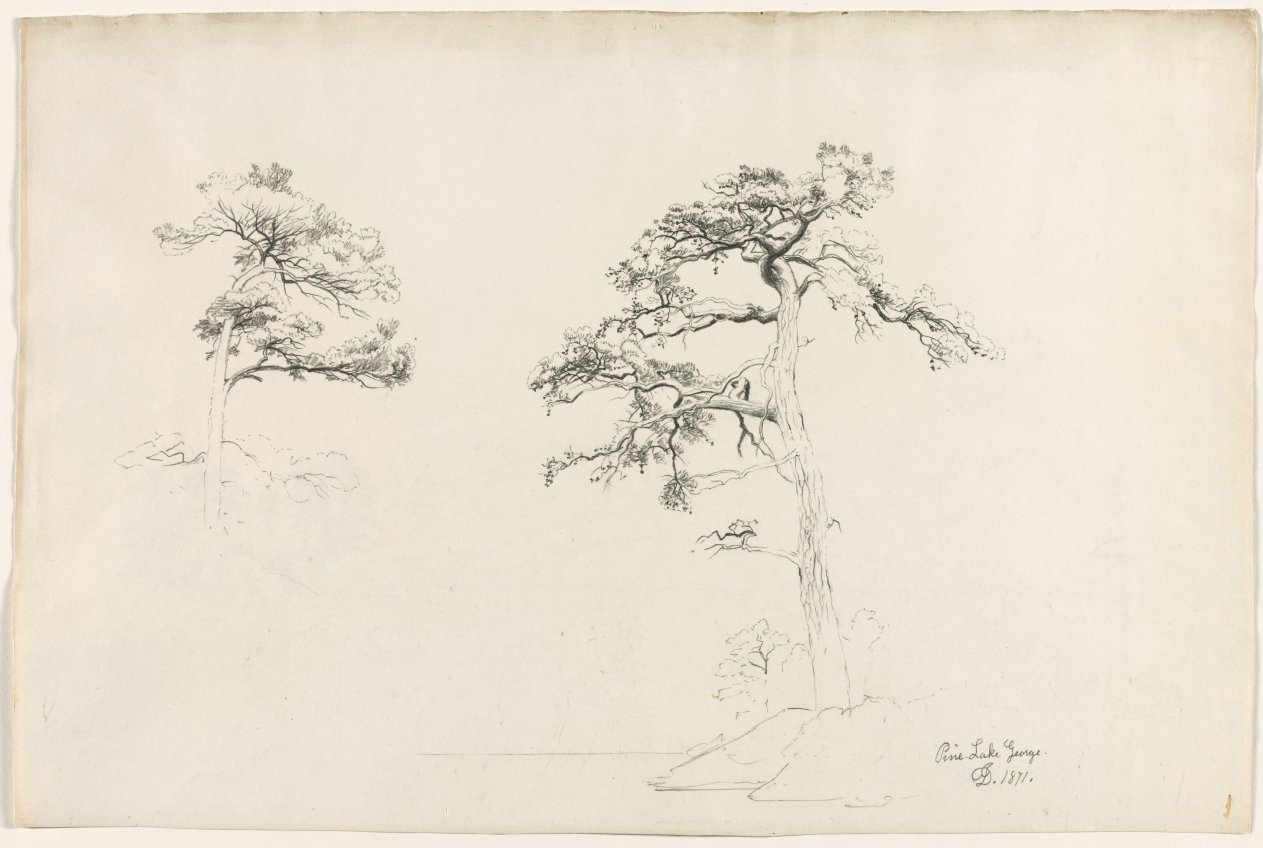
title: Pine, Lake George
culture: America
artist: David Johnson (American, 1827–1908)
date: 1871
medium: pencil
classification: Drawing